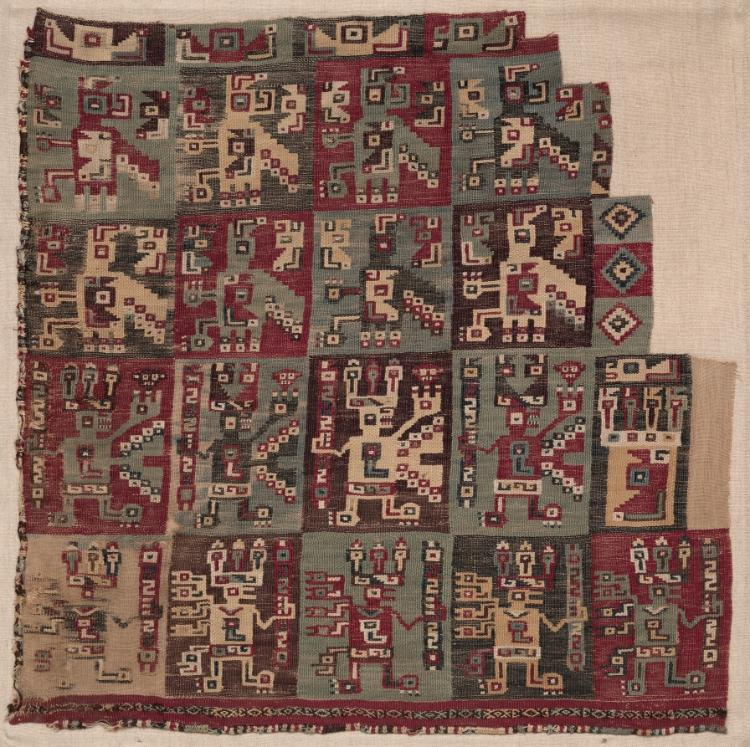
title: Mantle Corner Fragment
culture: Peru, South Coast, Wari Culture, Middle Horizon, 8th-11th Century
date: 700–1100 A.D.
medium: cotton and camelid fiber; plain weave with supplementary weft (brocade)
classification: Textile